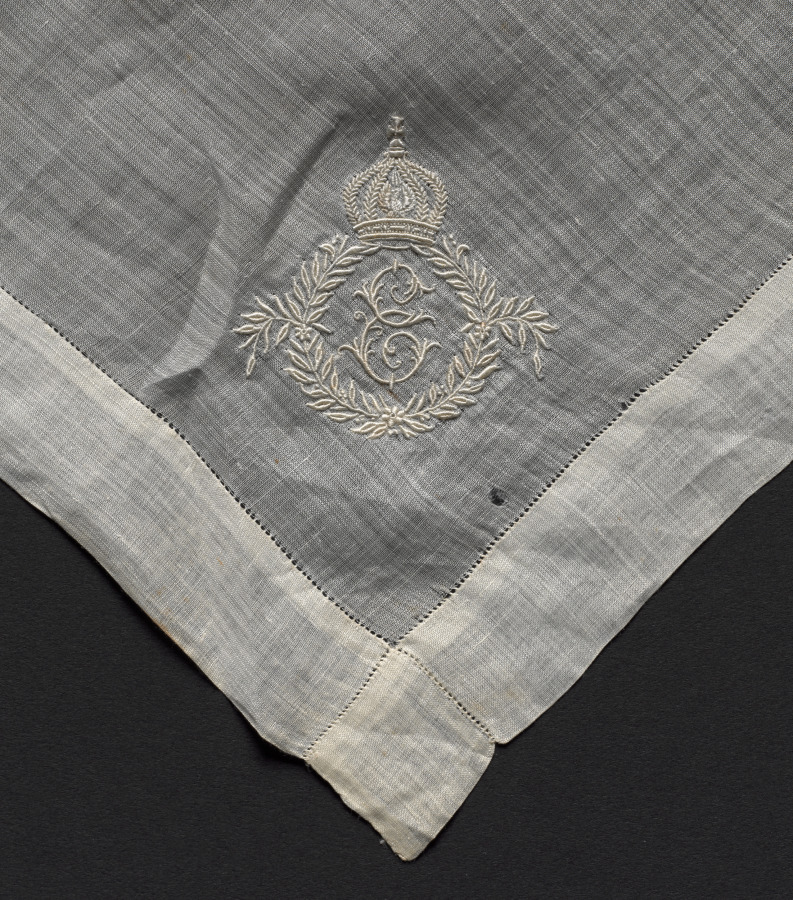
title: Handkerchief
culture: France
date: 1800s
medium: linen: embroidery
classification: Embroidery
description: There is an initial E (for Empress Eugenie) and a crown embroidered in one corner of this handkerchief.